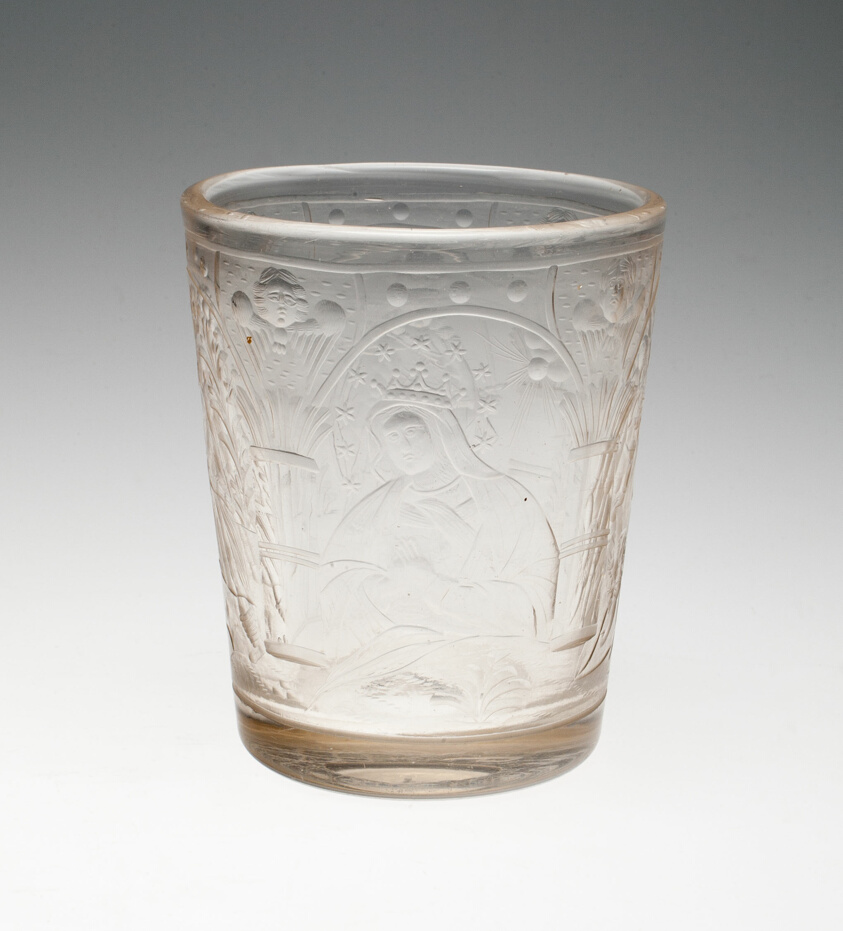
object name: Glass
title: Beaker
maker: Bohemia, Czech Republic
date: 1698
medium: Glass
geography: Bohemia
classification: glass; european decorative arts